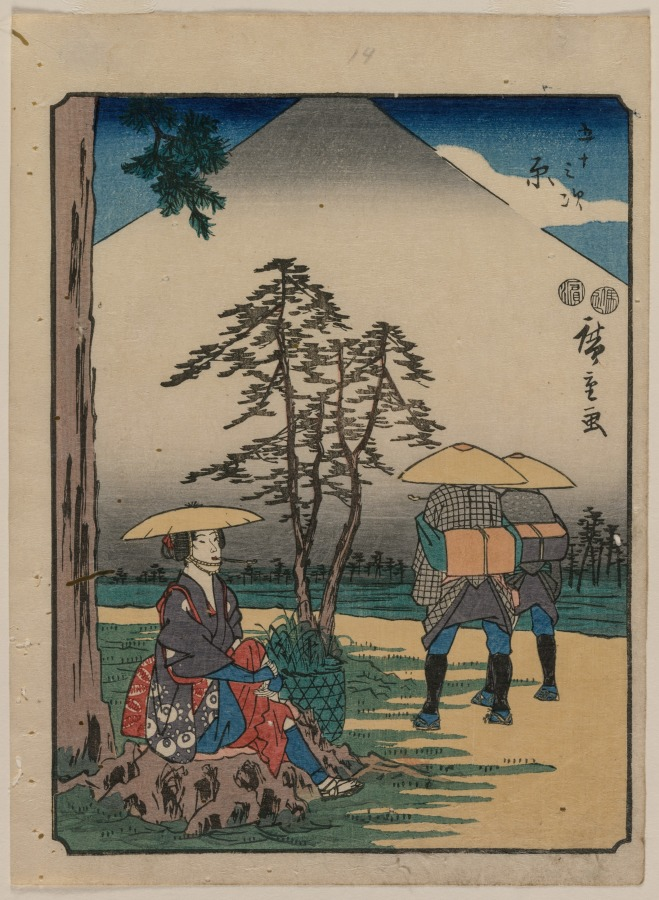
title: The Fifty-Three Stations of the Tokaido: Hara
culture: Japan, Edo period (1615–1868)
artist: Utagawa Hiroshige (Japanese, 1797–1858)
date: c. 1850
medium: color woodblock print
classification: Print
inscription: Publisher: Muraichi